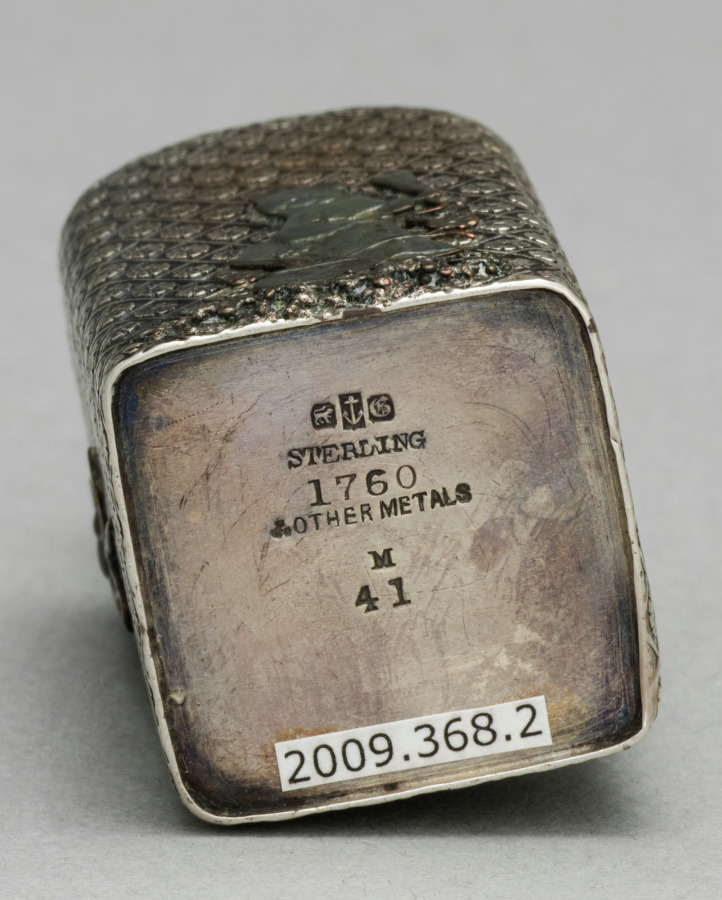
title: Pepper Shaker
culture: America, Rhode Island, Providence, 19th century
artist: Gorham Manufacturing Company (America, est. 1831)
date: c.1875–1885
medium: silver and mixed metals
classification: Silver